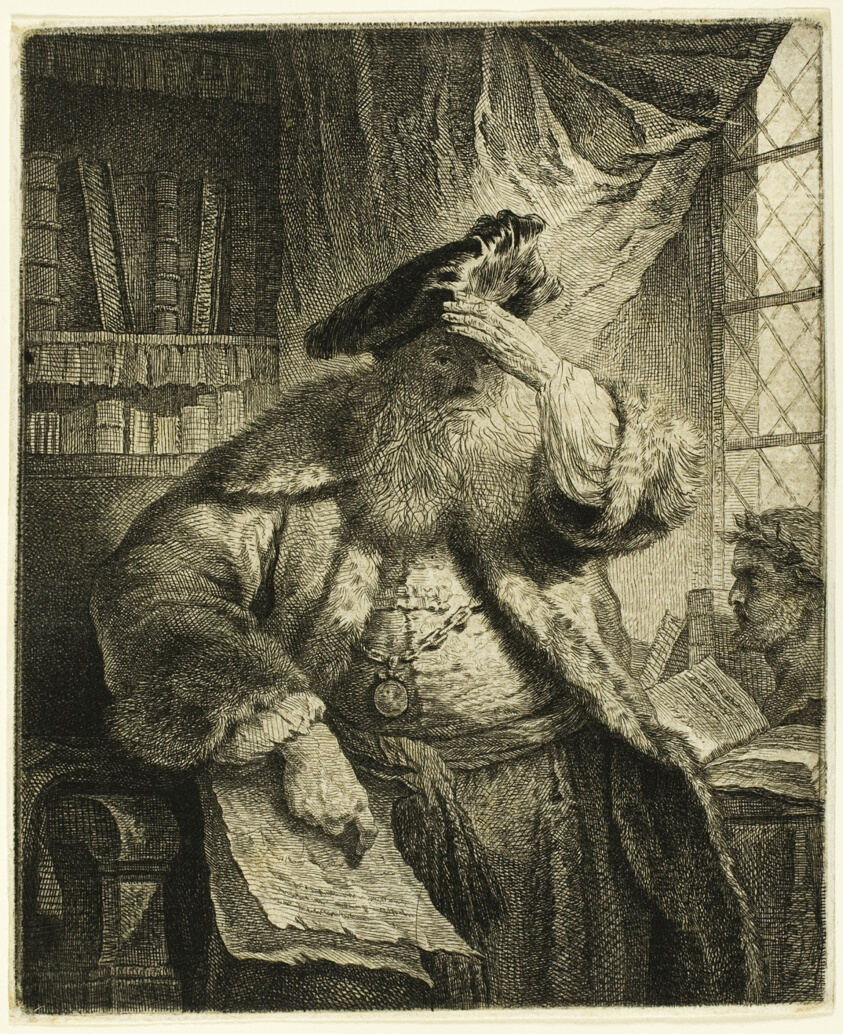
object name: Print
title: Old Man Shading His Eyes with His Hand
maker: Rembrandt van Rijn (Dutch, 1606-1669)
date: c. 1639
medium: Etching on off-white laid paper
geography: Holland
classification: etching; print; prints and drawing; paper